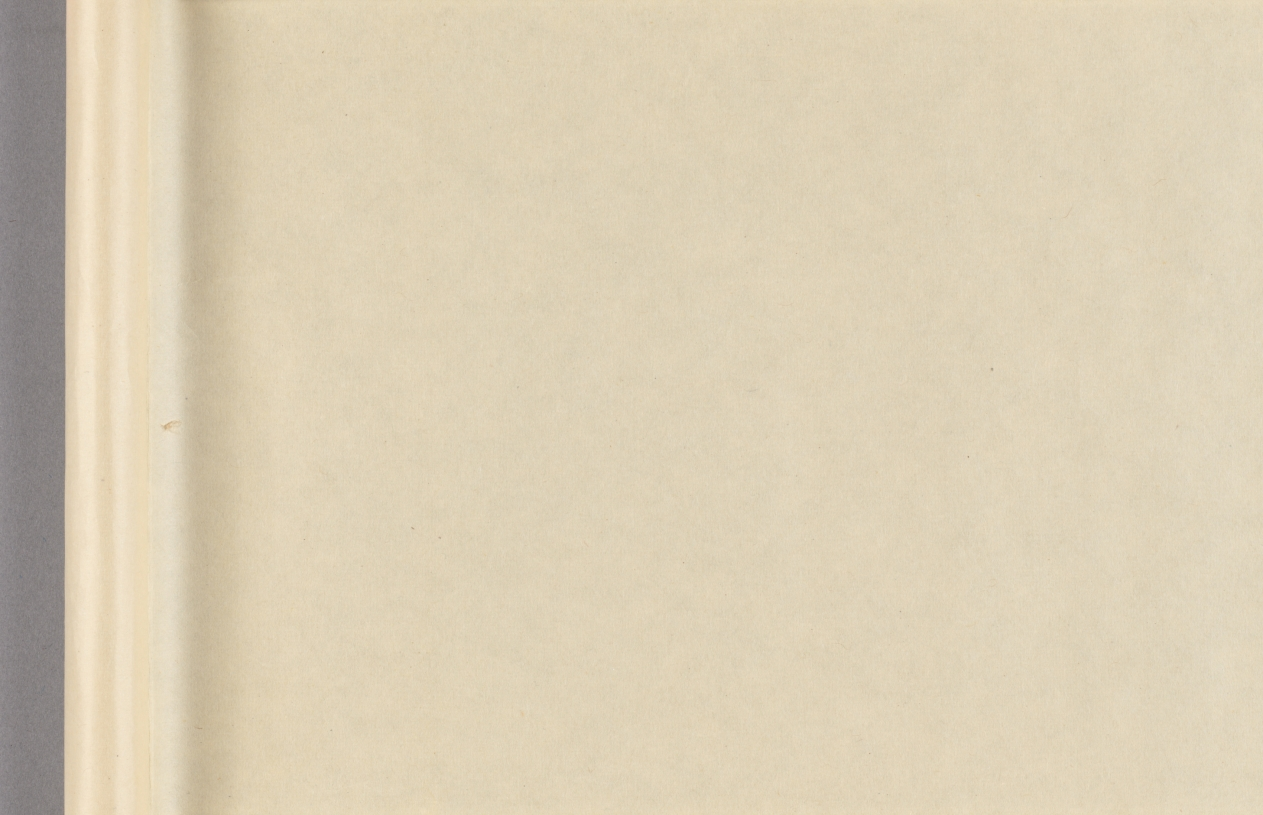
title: Eight Views of Xiao-Xiang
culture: Japan, Muromachi period (1392–1573)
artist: Sesson Shūkei (Japanese, c. 1492–c. 1577)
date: 1500s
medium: handscroll; ink on paper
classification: Painting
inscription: Signature and seal of artist at end of painting.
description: Eight Views of the Xiao and Xiang Rivers can be traced to 11th-century Chinese poems and paintings, the depiction of which had also become popular among Korean and Japanese painters. Xiao-Xiang refers to the region in present-day Hunan province where the Xiao and Xiang rivers converge. Few painters of the Eight Views had in fact seen the scenery; rather, they were trying to portray in ink and wash the lyrical qualities of dim light and a misty atmosphere typical of that region. Each of the poetic titles suggests a time of day, a season, or specific atmospheric conditions—subjects that challenged the abilities of the most talented artists. In this miniature painting (shukuzu) of the Muromachi period, Japanese Zen monk and painter Shukei Sesson depicted all eight views featured in Chinese prototypes: Wild Geese Descending to Sandbar; Returning Sails Off a Distant Coast; Mountain Market in Clearing Mist; River and Sky in Evening Snow; Autumn Moon over Dongting Lake; Night Rain on the Xiao and Xiang; Evening Bell from Mist-Shrouded Temple; and Fishing Village in Evening Glow.